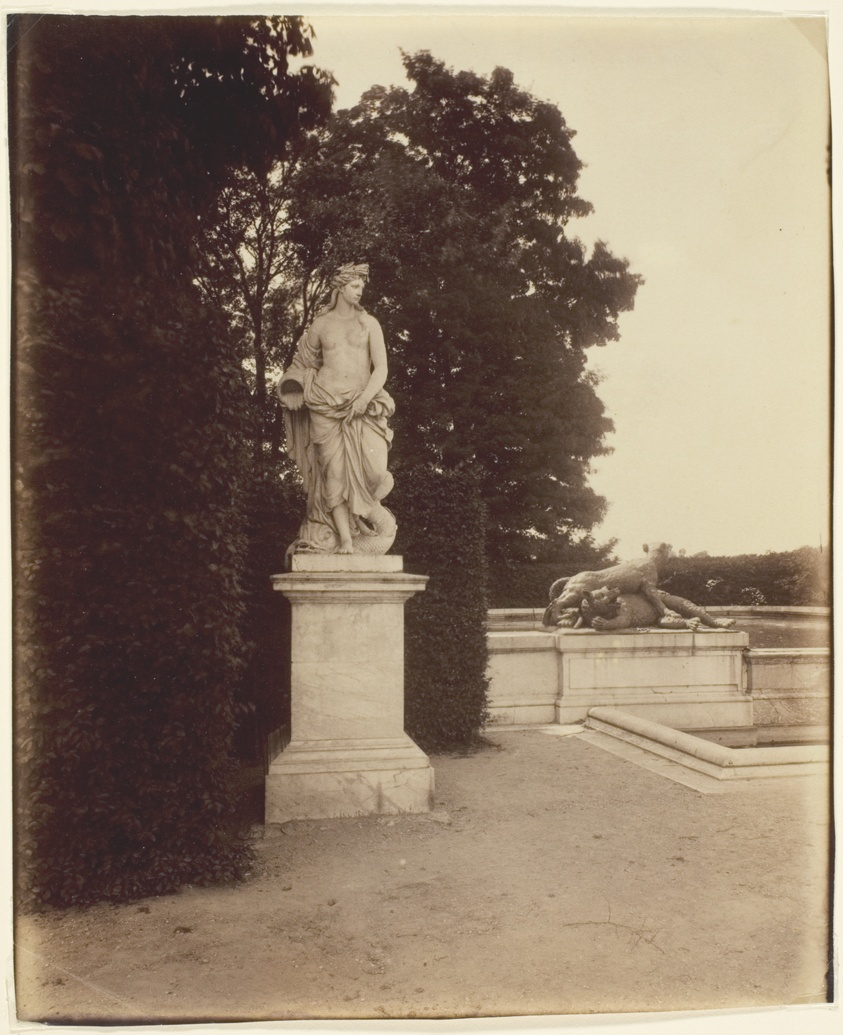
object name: Photograph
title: Versailles, L'Eau par Legras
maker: Jean-Eugène-Auguste Atget (French, 1857–1927)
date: 1901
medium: Albumen print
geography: France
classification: albumen silver print; photographic process; photography; photograph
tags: Collected by Hugh Edwards